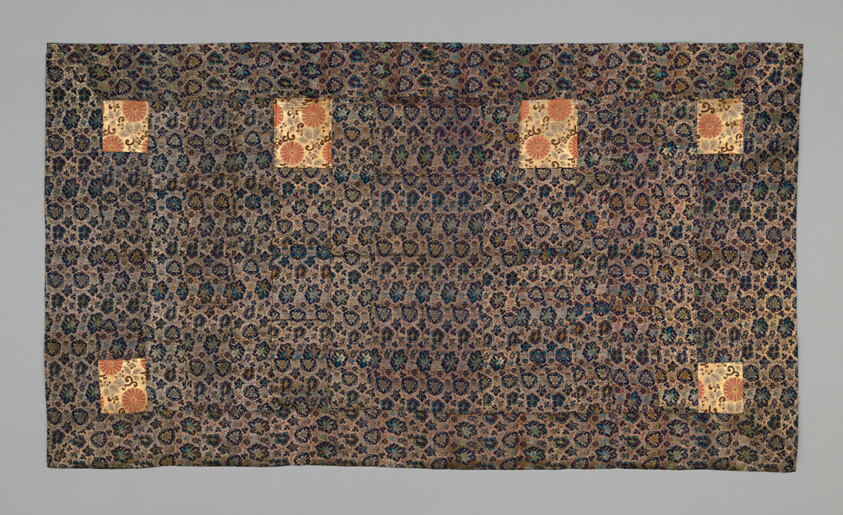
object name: Textile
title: Kesa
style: meiji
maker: Japan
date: Meiji period (1868–1912), late 19th century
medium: Silk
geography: Japan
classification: textile; costume; liturgical - buddhist; weaving